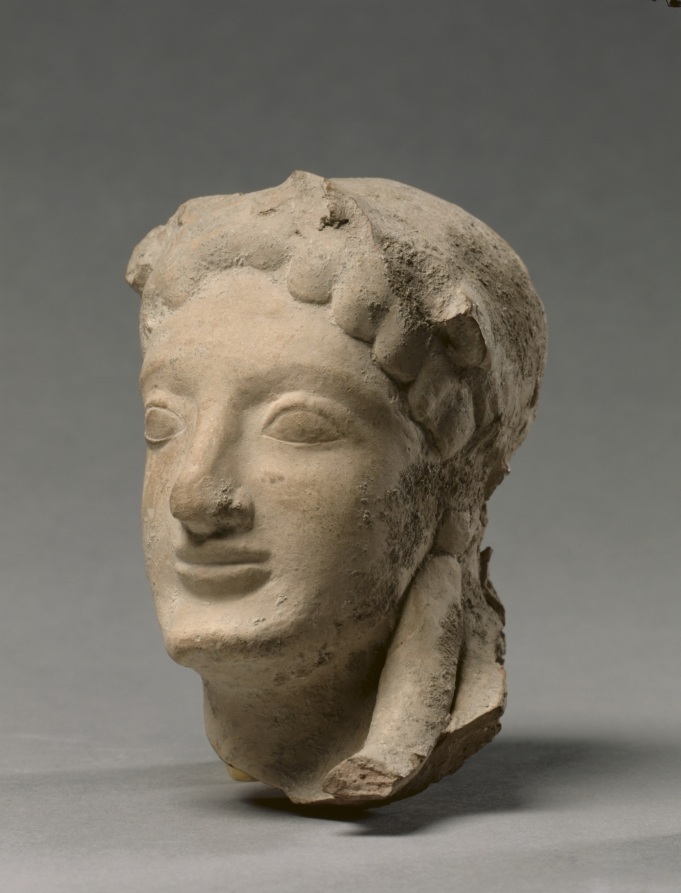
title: Head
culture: Greece, Sicily, Selinus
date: 525 BCE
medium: terracotta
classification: Sculpture